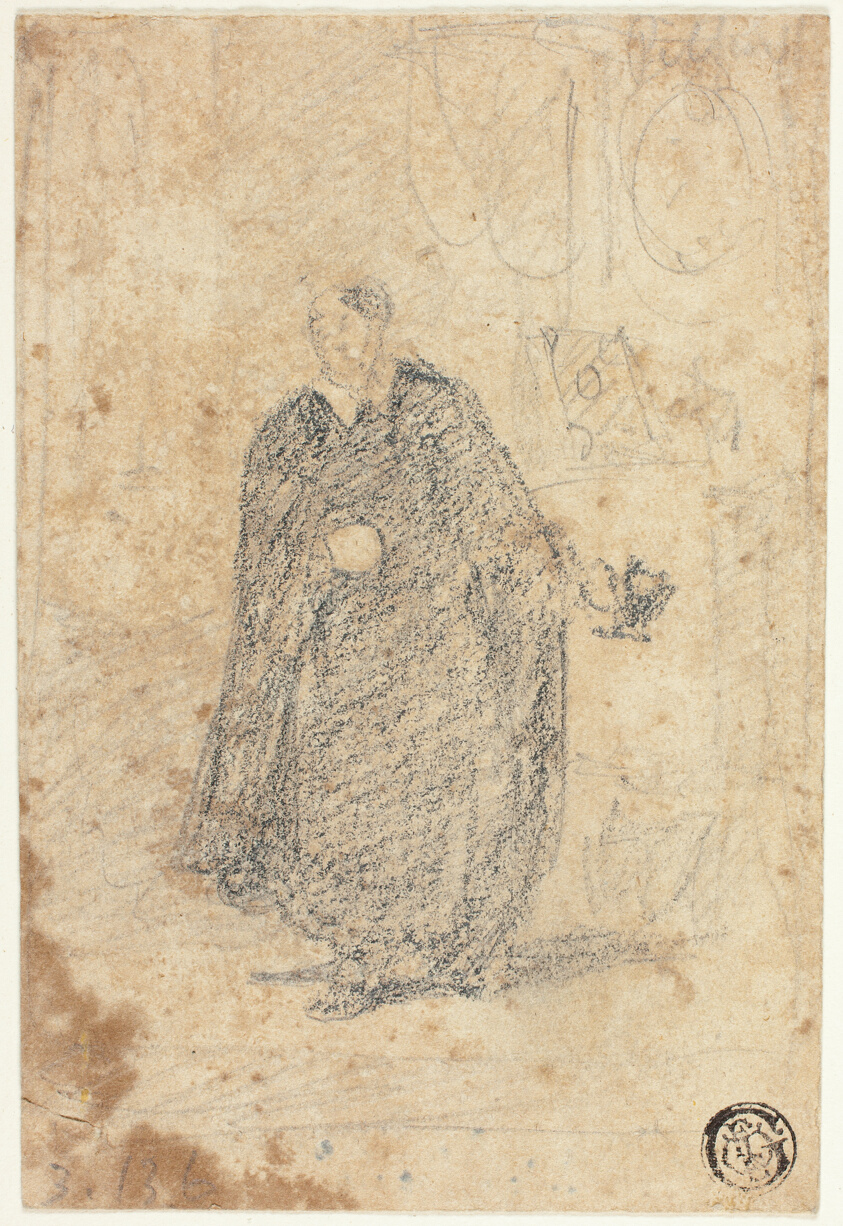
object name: Drawing and Watercolor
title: Sketch of Actor Standing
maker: John Sell Cotman (English, 1782-1842)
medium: Graphite on tan wove paper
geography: England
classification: graphite; drawings (visual works); prints and drawing